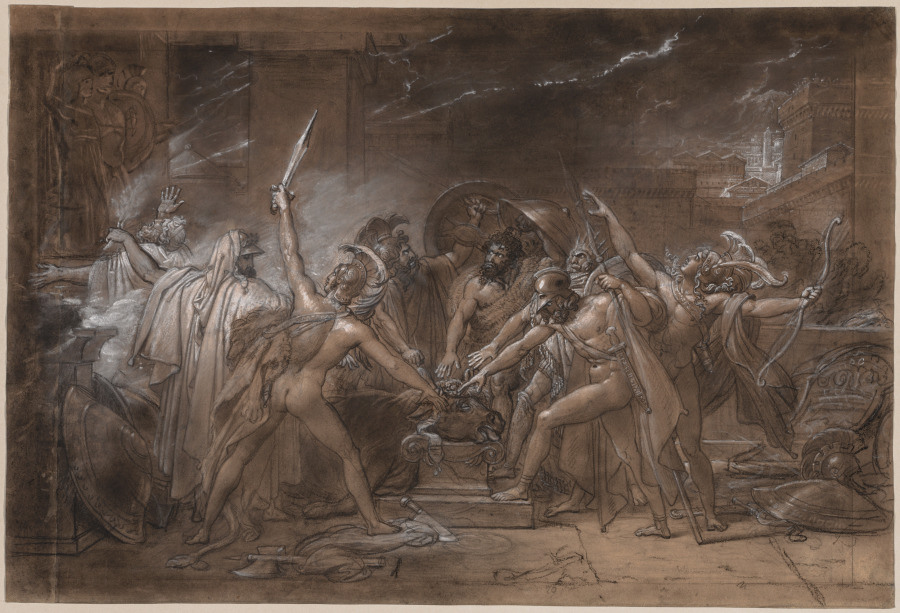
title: The Oath of the Seven Chiefs against Thebes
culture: France, late 18th, early 19th century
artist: Anne-Louis Girodet de Roucy-Trioson (French, 1767–1824)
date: c. 1800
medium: Black chalks and white chalk with stumping and erasing on light brown wove paper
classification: Drawing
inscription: The number 29 (est.) is inscribed along the bottom edge in graphite (over black chalk?)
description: Girodet found inspiration for this drawing in Aeschylus’s Greek tragedy Seven against Thebes. Dramatized with powerful physicality, seven warrior leaders from Argos raise weapons to the war deities Ares and Enyo at the far left as they immerse their hands in the blood of a sacrificed bull, and swear an oath to defeat Thebes. Girodet’s strong black outlines and idealized male nudes are characteristic of Neoclassicism’s calculated restraint. Yet the flash of lightning and the warrior’s impassioned expressions intensify the emotional and psychological content of the scene, anticipating the growth of romanticism in European art during the early 1800s.